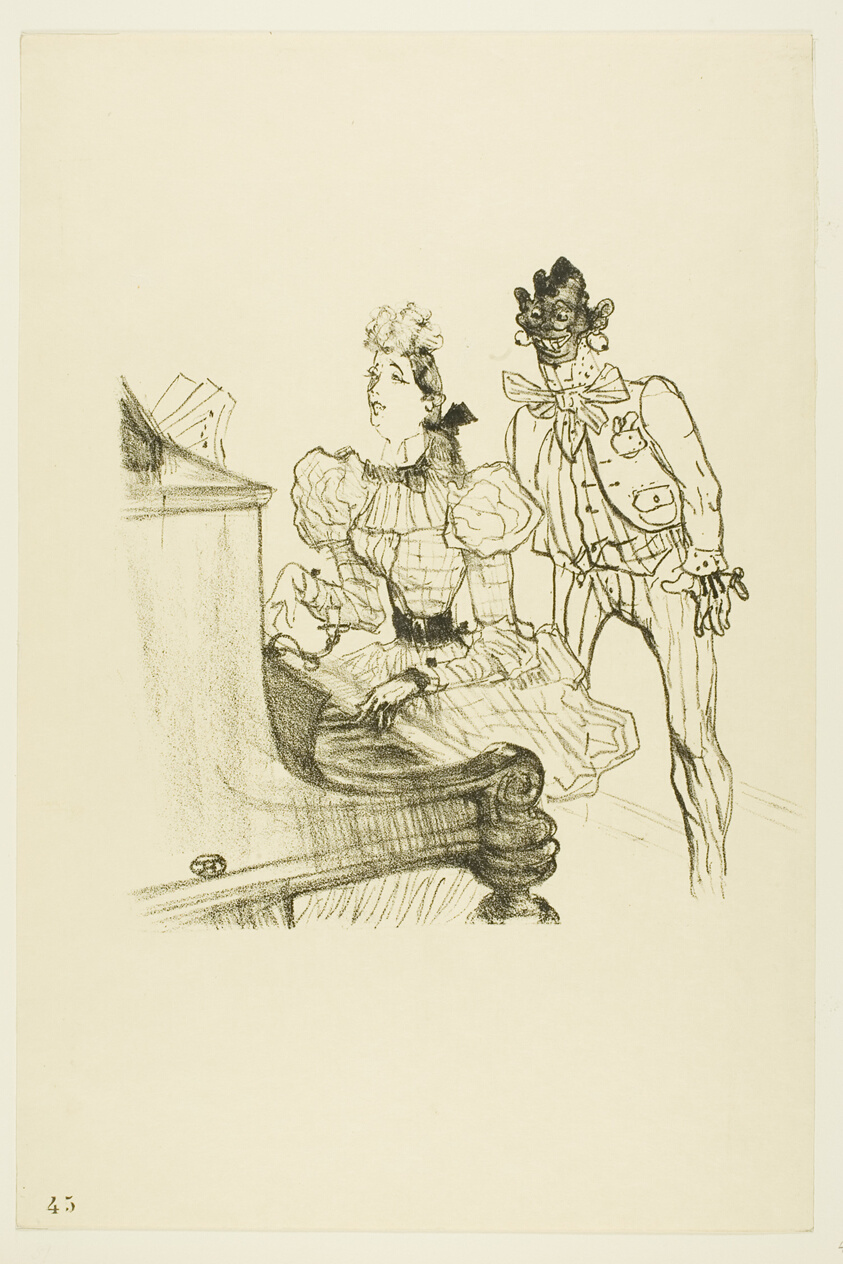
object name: Print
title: Zamboula-Polka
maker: Henri de Toulouse-Lautrec (French, 1864-1901)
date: 1900, printed after 1901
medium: Lithograph on cream wove paper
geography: France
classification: lithograph; print; prints and drawing